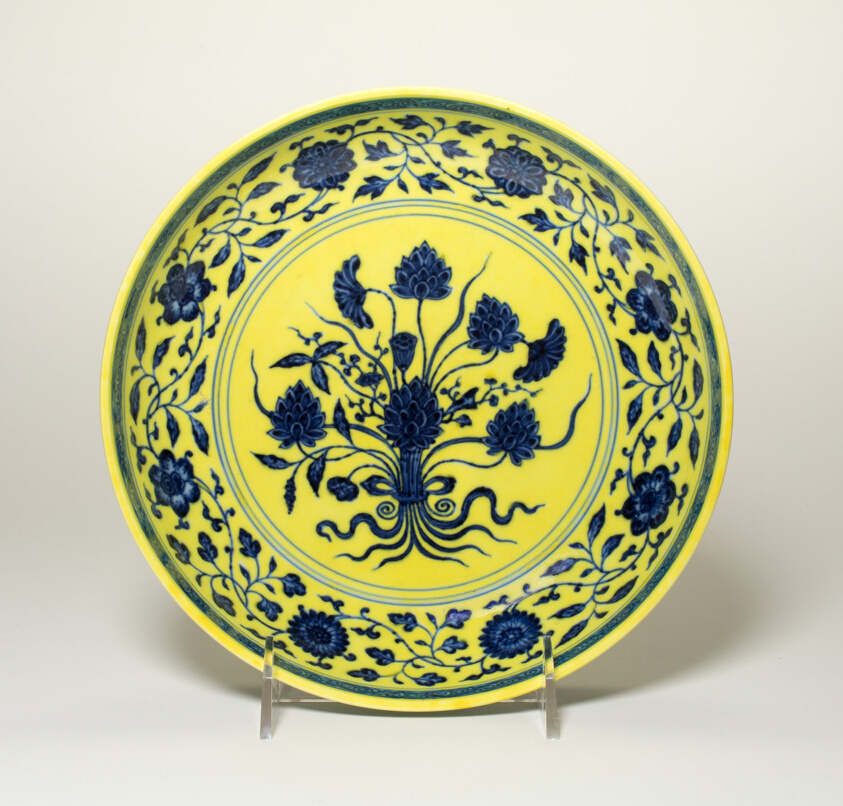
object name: Vessel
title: Dish with Floral Bouquet Tied with a Riboon Encircled by Chrysanthemum and Peony Scrolls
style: Chinese (culture or style)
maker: China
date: Qing dynasty (1644–1911), Yongzheng reign mark and period (1723–35)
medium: Porcelain painted in underglaze blue and overglaze yellow enamel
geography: China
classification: dish (vessel); porcelain; ceramics; asian art; vessel